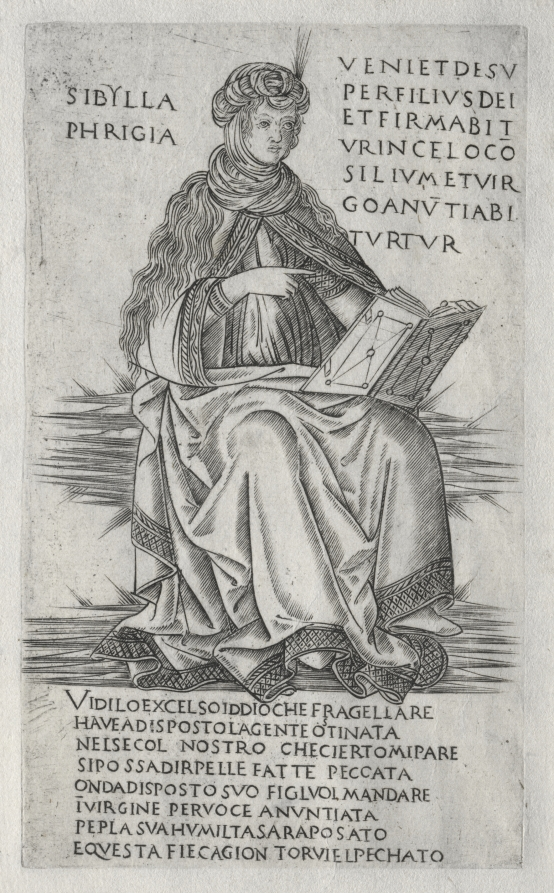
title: The Sibyls: The Phrygian Sibyl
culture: Italy, Florence, last quarter 15th Century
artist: Francesco Rosselli (Italian, 1448-about 1513)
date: c. 1470–1480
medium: engraving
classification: Print